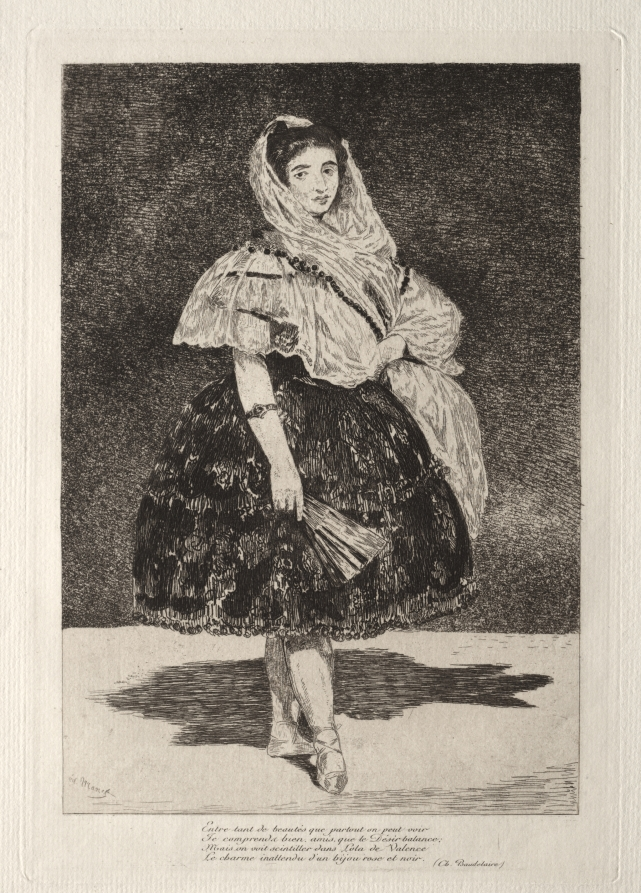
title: Lola de Valence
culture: France, 19th century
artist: Édouard Manet (French, 1832–1883)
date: 1862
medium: etching and aquatint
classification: Print